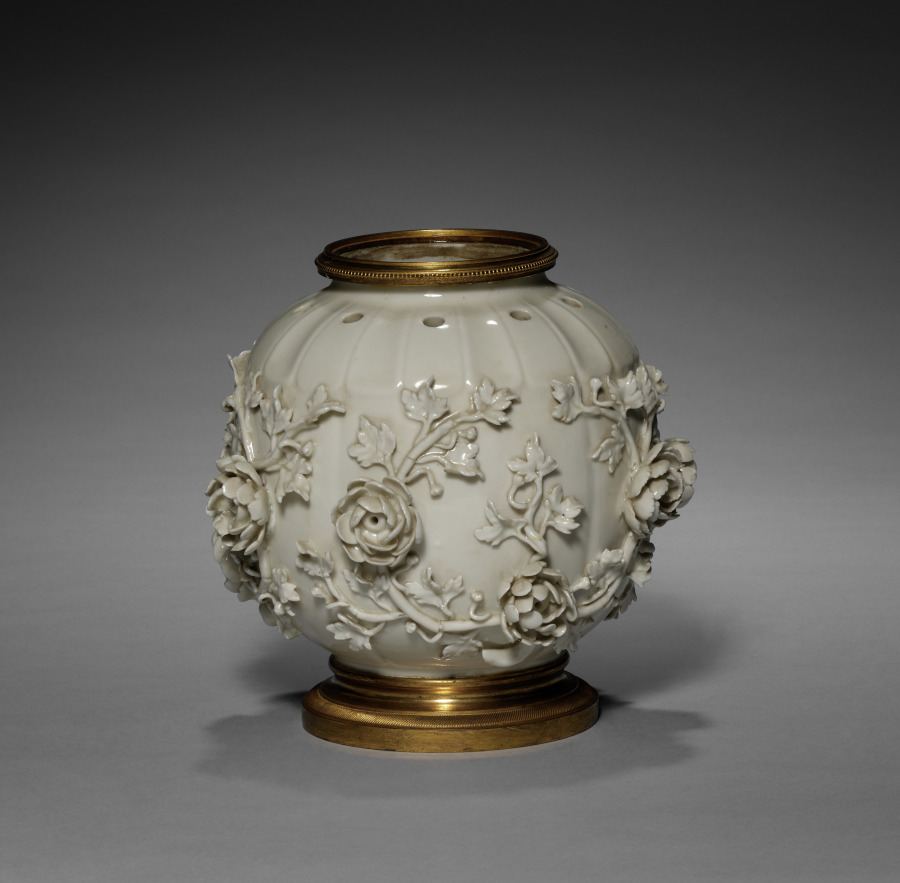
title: Potpourri Vase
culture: France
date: 1860–1880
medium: blanc-de-chine porcelain; gilt bronze mount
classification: Ceramic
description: This vase—part of a pair of covered vases—was created to contain potpourri, a mixture of flowers, herbs, and spices emitting ambient fragrance. This specific function offered a particularly fertile ground for the development of French porcelain from the mid-1700s, as manufactories experimented with forms, surface ornamentations, and placement of perforations. Produced by the firm of Edmé Samson in the 1800s, the vases pay homage to this history. While using updated technique and material, as well as more exuberant decorations, these vases draw upon designs by earlier innovators such as the Saint-Cloud manufactory.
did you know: Potpourri vases always have holes in the top to let the scent of dried spices and flowers contained within freshen the air around them.